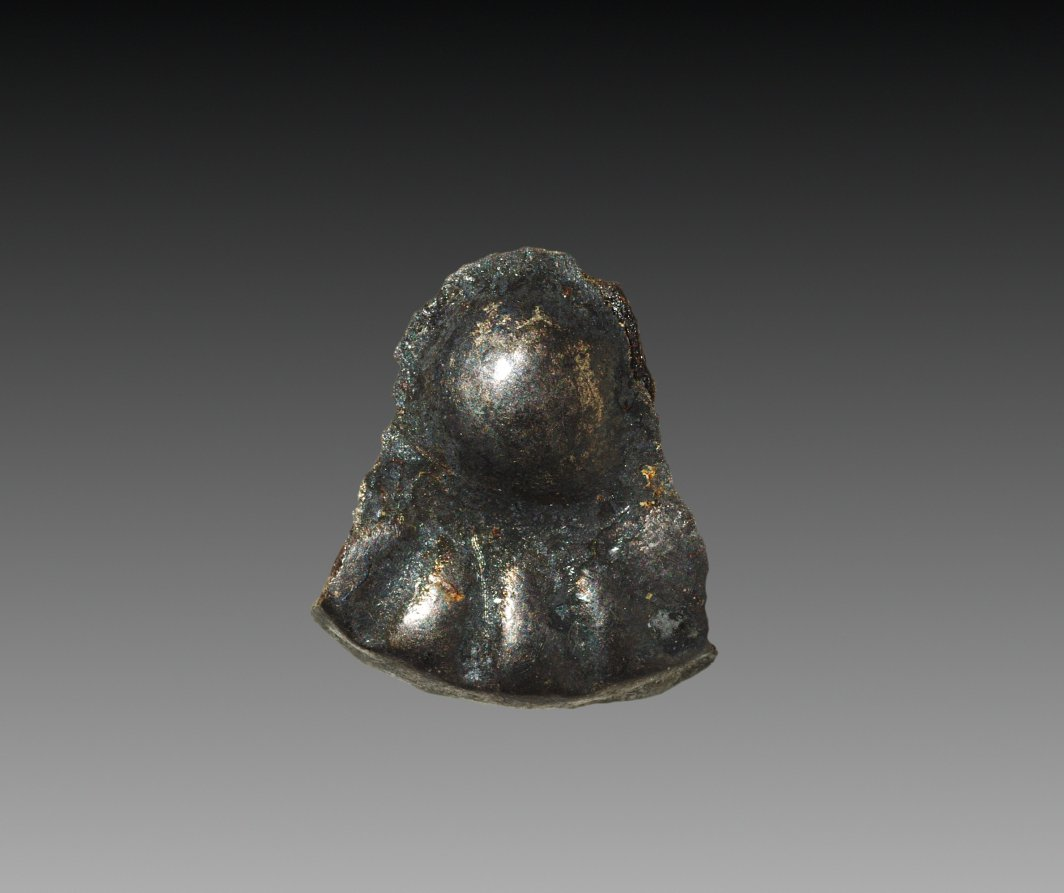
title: Rosette for Wig Decoration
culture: Egypt, Middle Kingdom (2040–1648 BCE), Dynasty 12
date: 1980–1801 BCE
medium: silver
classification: Jewelry